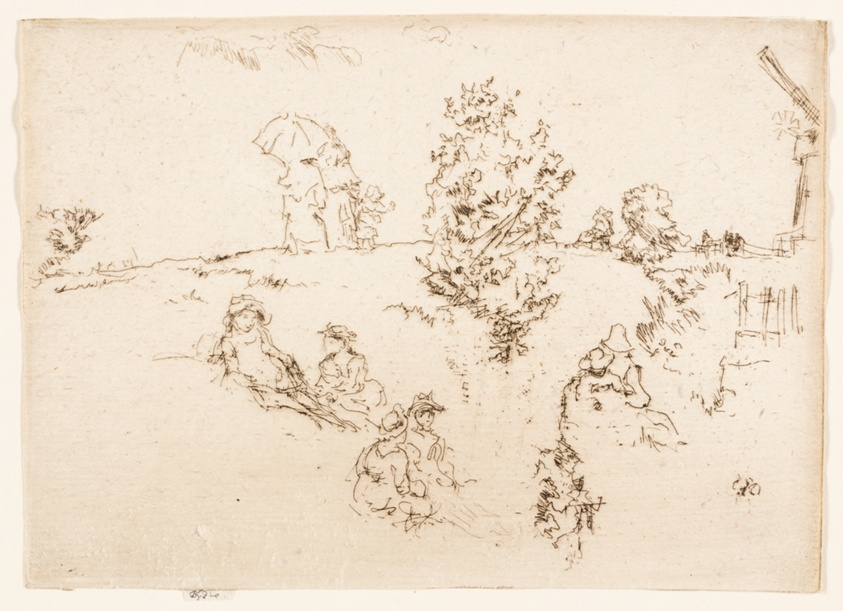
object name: Print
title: The Ramparts, Sandwich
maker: James McNeill Whistler (American, 1834-1903)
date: 1887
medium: Etching with foul biting in black ink on ivory laid paper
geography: United States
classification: etching; foul biting; print; prints and drawing; paper